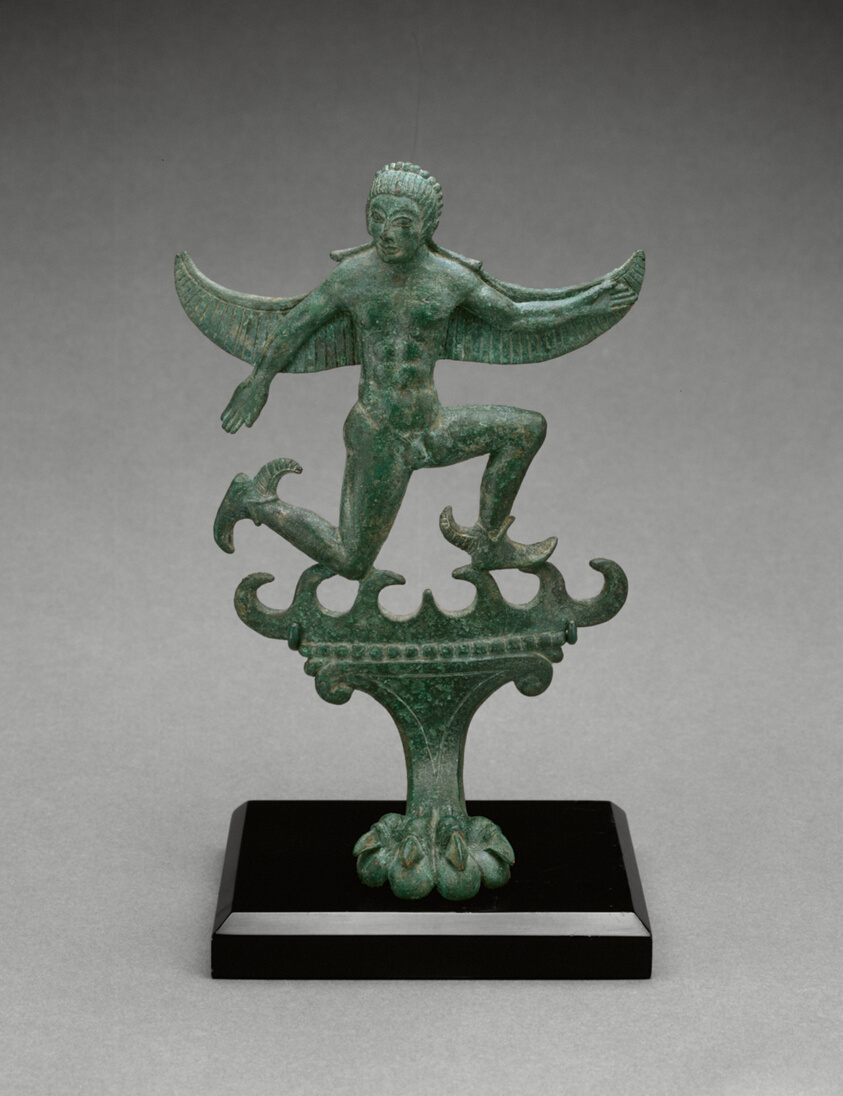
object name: Sculpture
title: Foot of a Cista (Storage Box)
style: etruscan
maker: Etruscan; probably Vulci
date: early 5th century BCE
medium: Bronze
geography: Vulci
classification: bronze; metalwork; ancient art; sculpture